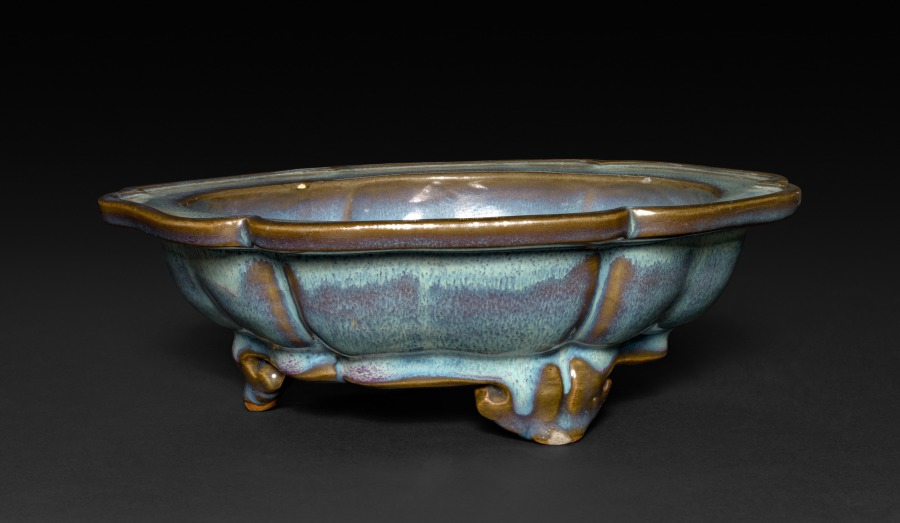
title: Flower Pot Stand or Bulb Bowl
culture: China, possibly Henan province, Yuan dynasty (1271-1368) - Ming dynasty (1368-1644)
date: 1300s–1400s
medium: glazed gray stoneware, Jun ware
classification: Ceramic